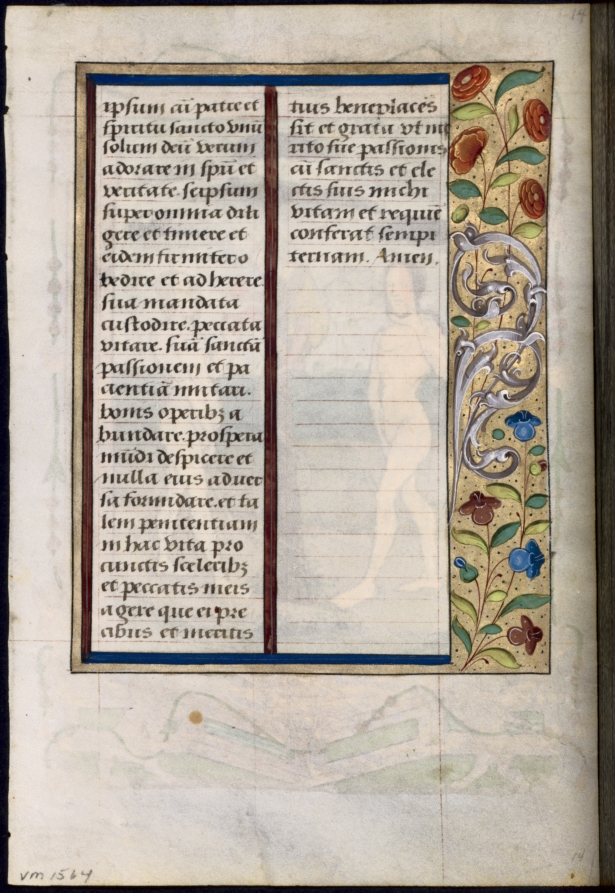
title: Leaf from a Book of Hours: Text with Illustrated Border (verso)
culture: France, Rouen, 16th century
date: c. 1510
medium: ink, tempera and liquid gold on vellum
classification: Manuscript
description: This leaf came from a highly customized and lavish book of hours made in Rouen, a major center for book production. Intended for a female patron, the original book, to which the museum owns three leaves, contained numerous illuminations and marginalia. The book was whole until the 1980s, when it was dismembered and the leaves sold separately. Other leaves from the same book are now in the Walters Art Museum in Baltimore, Maryland, and the Bodleian Library in Oxford, England. This leaf precedes the opening of the Hours of the Virgin and the traditional first scene of the Annunciation.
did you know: The heart of every book of hours is the Hours of the Virgin, a set of prayers in which the reader asked the Virgin Mary to intercede on their behalf.